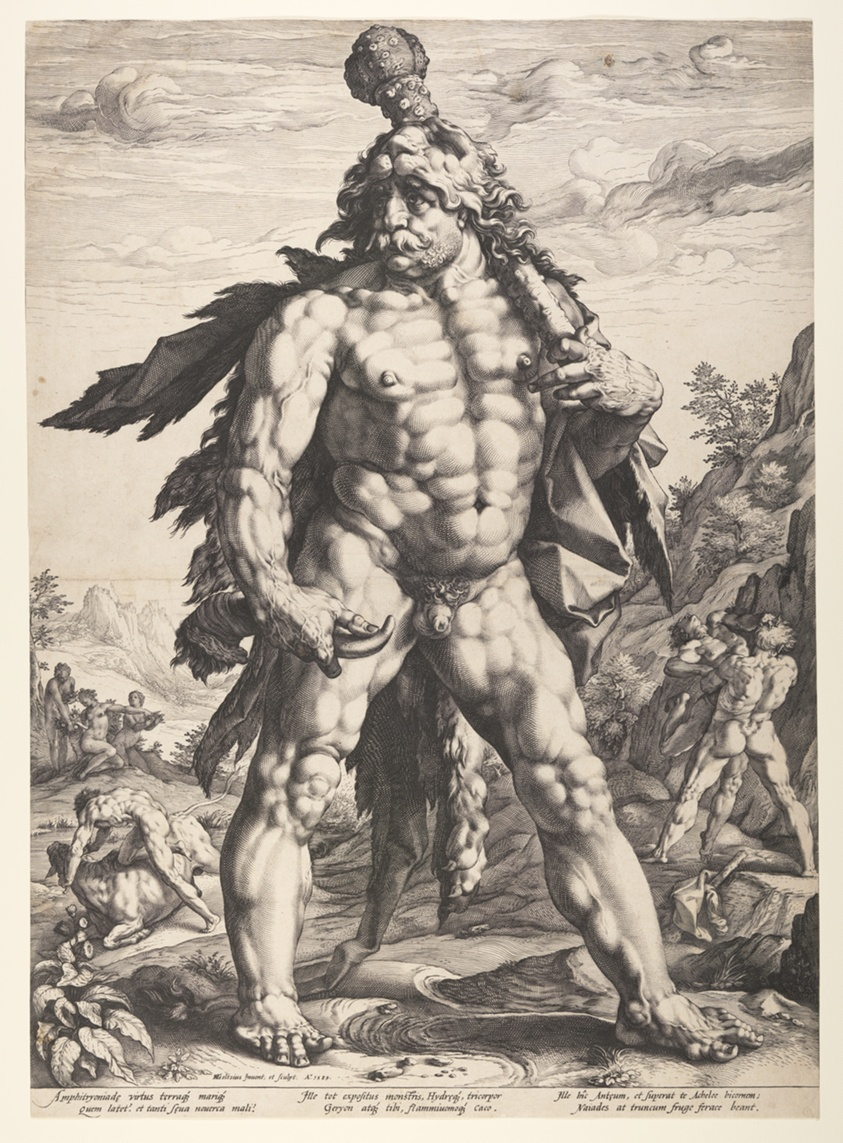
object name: Print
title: The Great Hercules (Knollenman)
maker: Hendrick Goltzius (Dutch, 1558–1617)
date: 1589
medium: Engraving on ivory laid paper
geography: Netherlands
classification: engraving; paper; print; prints and drawing